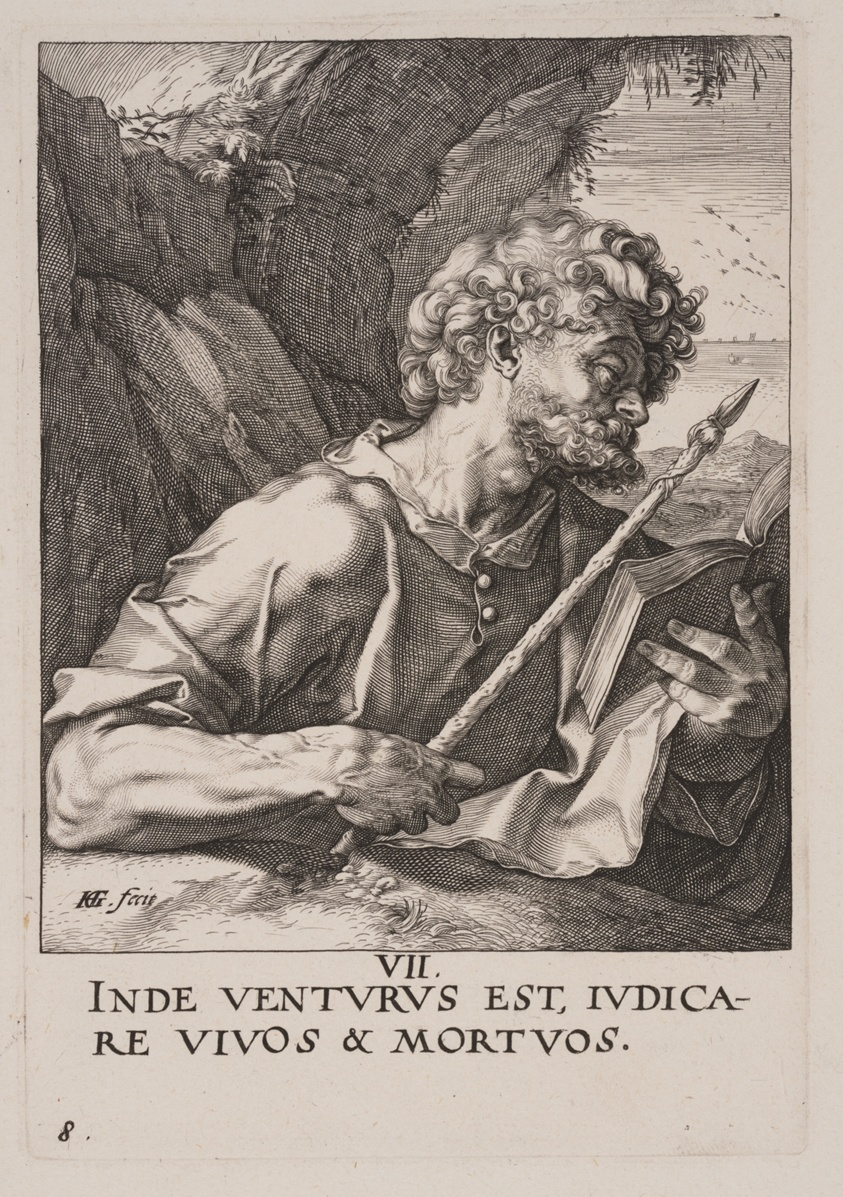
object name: Print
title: St Thomas, from Christ, the Apostles and St Paul with the Creed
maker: Hendrick Goltzius (Dutch, 1558–1617)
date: 1589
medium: Engraving on ivory laid paper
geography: Netherlands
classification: print; paper; prints and drawing; engraving